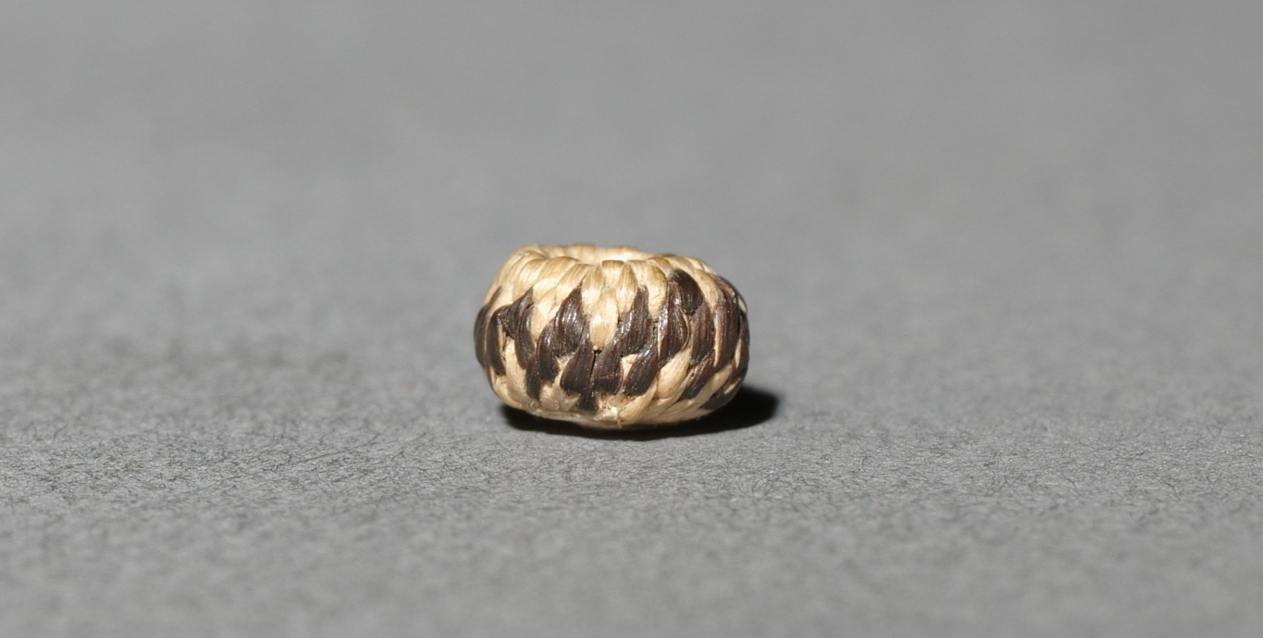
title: Miniature Round Basket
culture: California, Pomo, late 19th-early 20th century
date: late 1800s-early 1900s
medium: plant materials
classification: Basketry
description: Miniature baskets were made to demonstrate the basket-maker’s virtuoso skill, and these tiny marvels seem to be no exception -- the smallest are just a few millimeters wide but still patterned. For such fine work, dexterity was required as much for preparation of materials as for weaving.